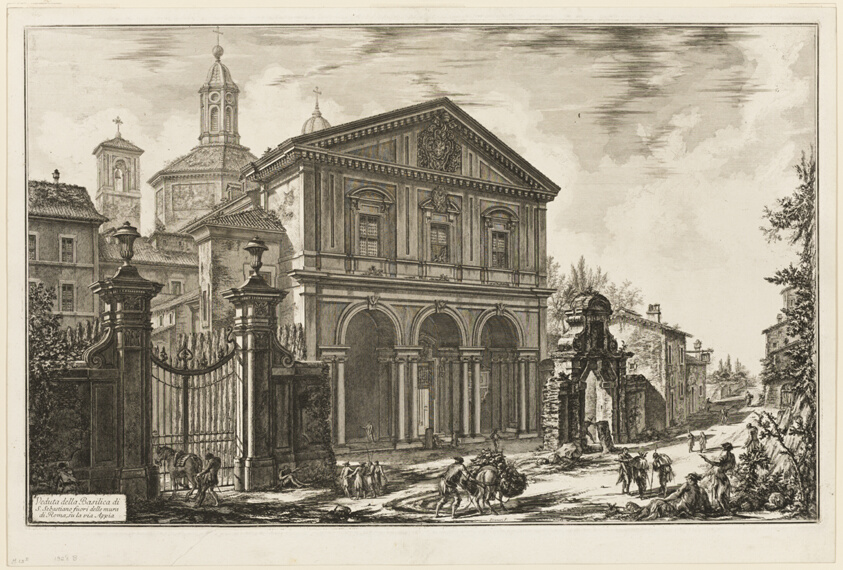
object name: Print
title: View of the Basilica of San Sebastiano fuori delle mura [St. Sebastian outside the Walls] on the Appian Way, from Views of Rome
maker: Giovanni Battista Piranesi (Italian, 1720-1778)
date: 1750/59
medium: Etching on heavy ivory laid paper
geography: Italy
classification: etching; print; prints and drawing